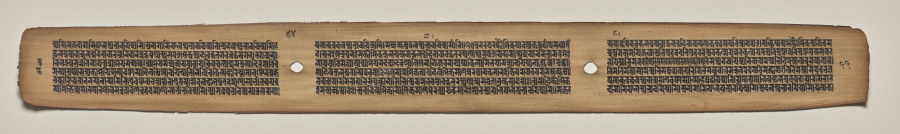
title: Text, Folio 44 (verso), from a Manuscript of the Perfection of Wisdom in Eight Thousand Lines (Ashtasahasrika Prajnaparamita-sutra)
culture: Eastern India, Bihar, Vikramashila Monastery. Painting: Nepal, Kathmandu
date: Sunday, September 14, 1119 (year 239 of the Newar Samvat in the month of Ashvina)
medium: gum tempera and ink on palm leaves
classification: Painting